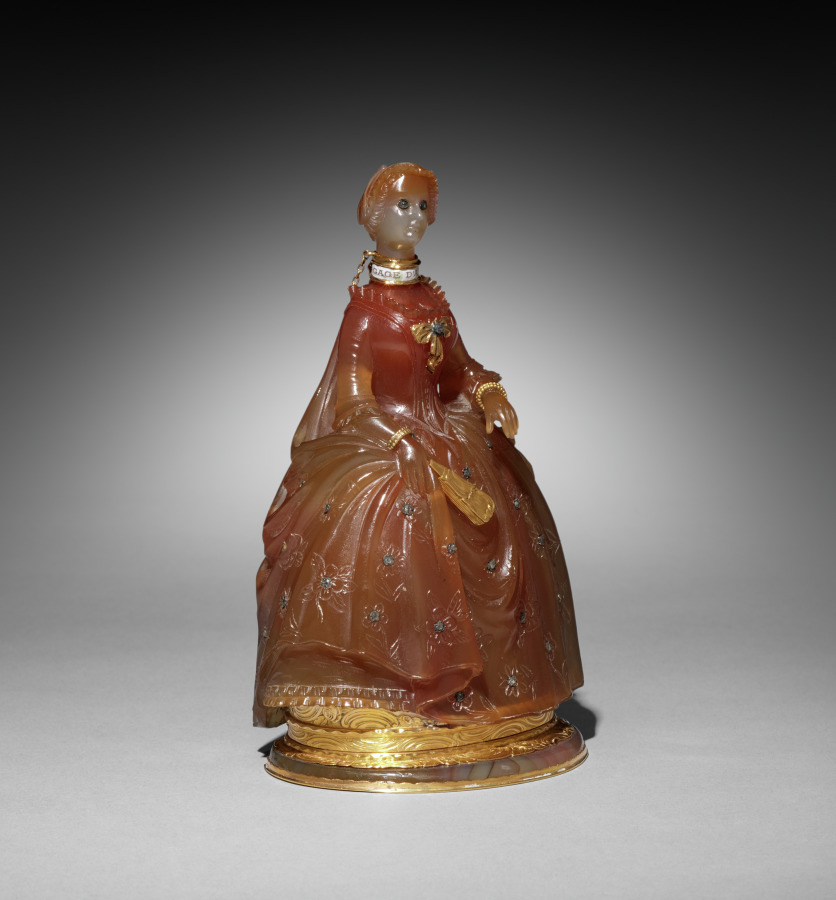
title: Scent Bottle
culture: England, 18th century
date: c. 1770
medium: chalcedony mounted in gold decorated with diamonds and enamel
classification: Miscellaneous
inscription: on neck collar: Gage d'amitie.